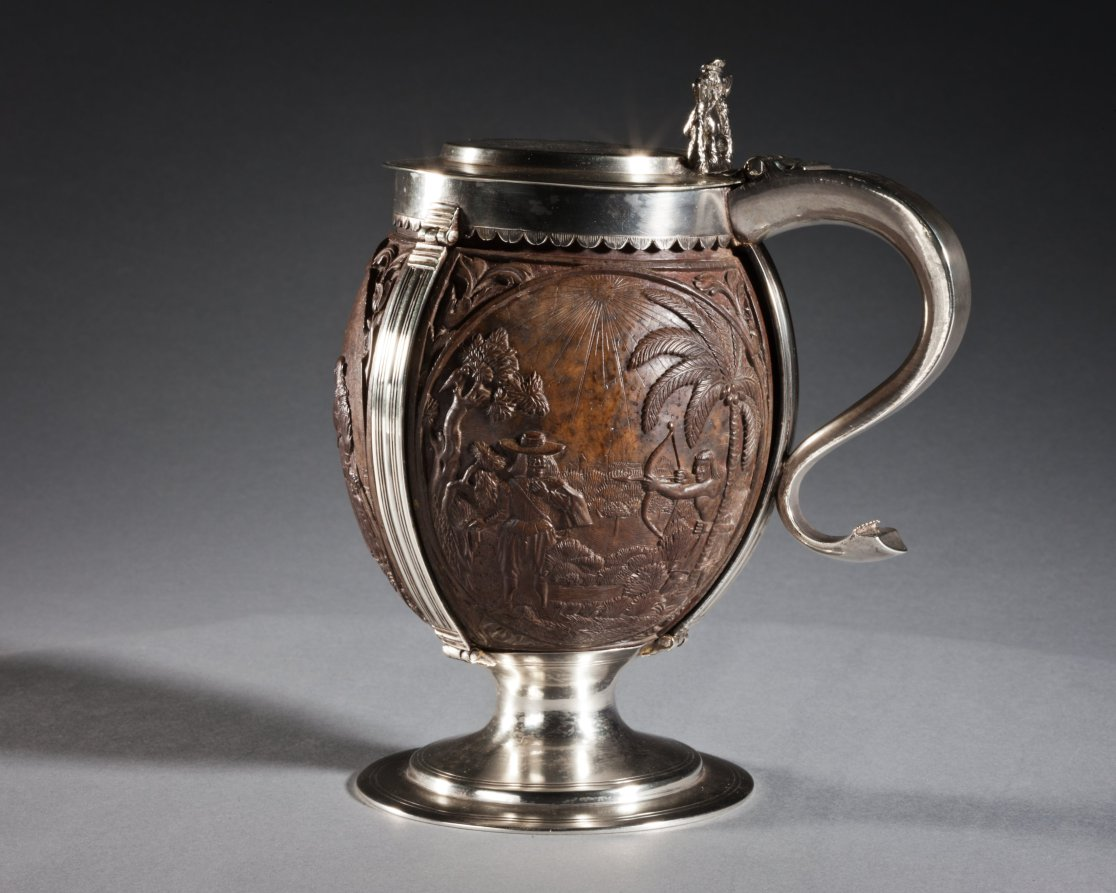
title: Coconut Cup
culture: carved coconut, probably The Netherlands; silver mount, probably England, 17th century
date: c. 1630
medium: carved coconut in silver mount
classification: Metalwork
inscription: top lid has engraved coat-of-arms, underside of lid has inscription: George Lewis TIVERTON Feby, 1st 1760.